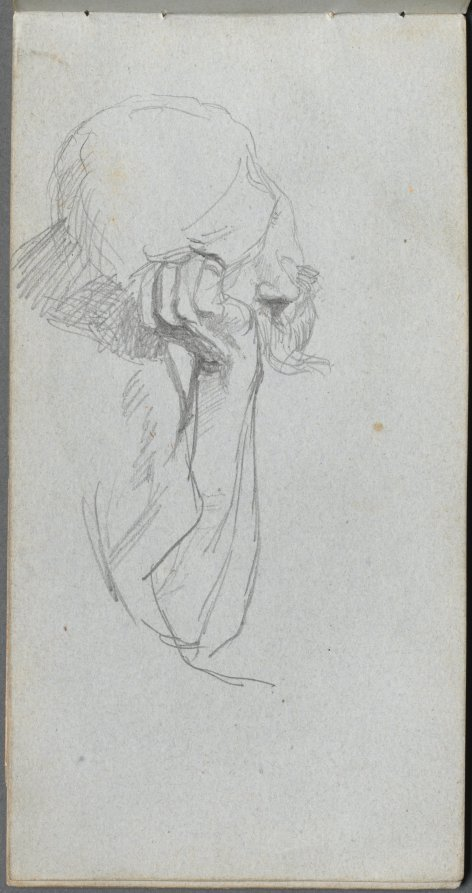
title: Sketchbook, page 16: Melancholy Figure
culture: France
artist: Ernest Meissonier (French, 1815–1891)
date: c. 1860s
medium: graphite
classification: Bound Volume